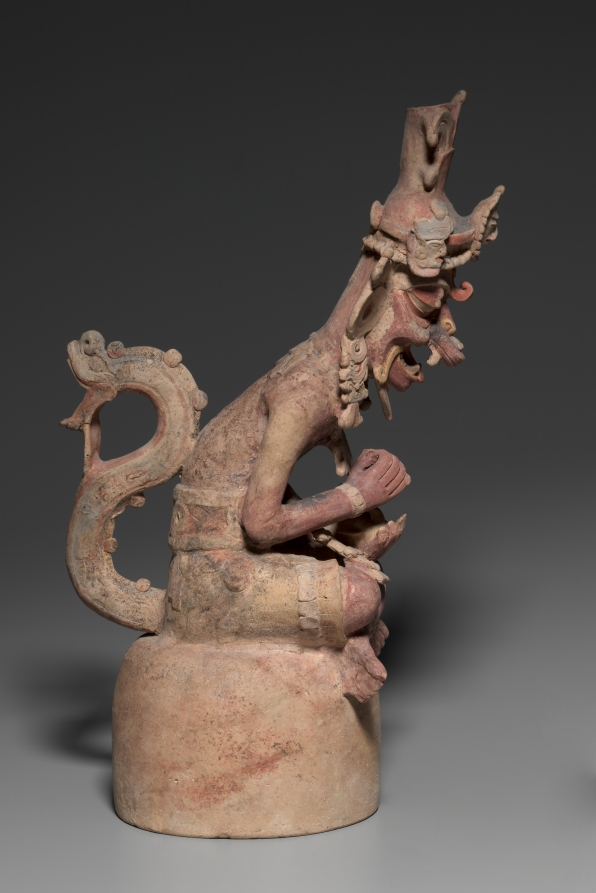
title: Artisan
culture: Guatemala, Petén region, Maya style (250-900), Maya style (250-900)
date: 250–600 CE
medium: earthenware with colored slips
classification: Sculpture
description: These figures represent the supernatural patrons of the visual arts and writing: the brothers Hun Batz and Hun Chuen ("One Monkey" and "One Artisan"). The two were refined artists but also bullies who tormented their younger brothers, who took revenge by transforming their elders into monkeys. Many Maya representations of the painter-scribes immortalize this fate by depicting the pair with both simian and human features, as here. The brothers are shown engaged in artistic or scribal pursuits. Sitting on high-domed bases that may have served as the lids of incense or offering bowls, each apparently once grasped a tool in his upper hand-for instance, a paint brush or a stylus for writing. In the lower hand, one cradles a small mask and the other, a piece of bark that likely refers to the beaten bark from which the Maya made books.